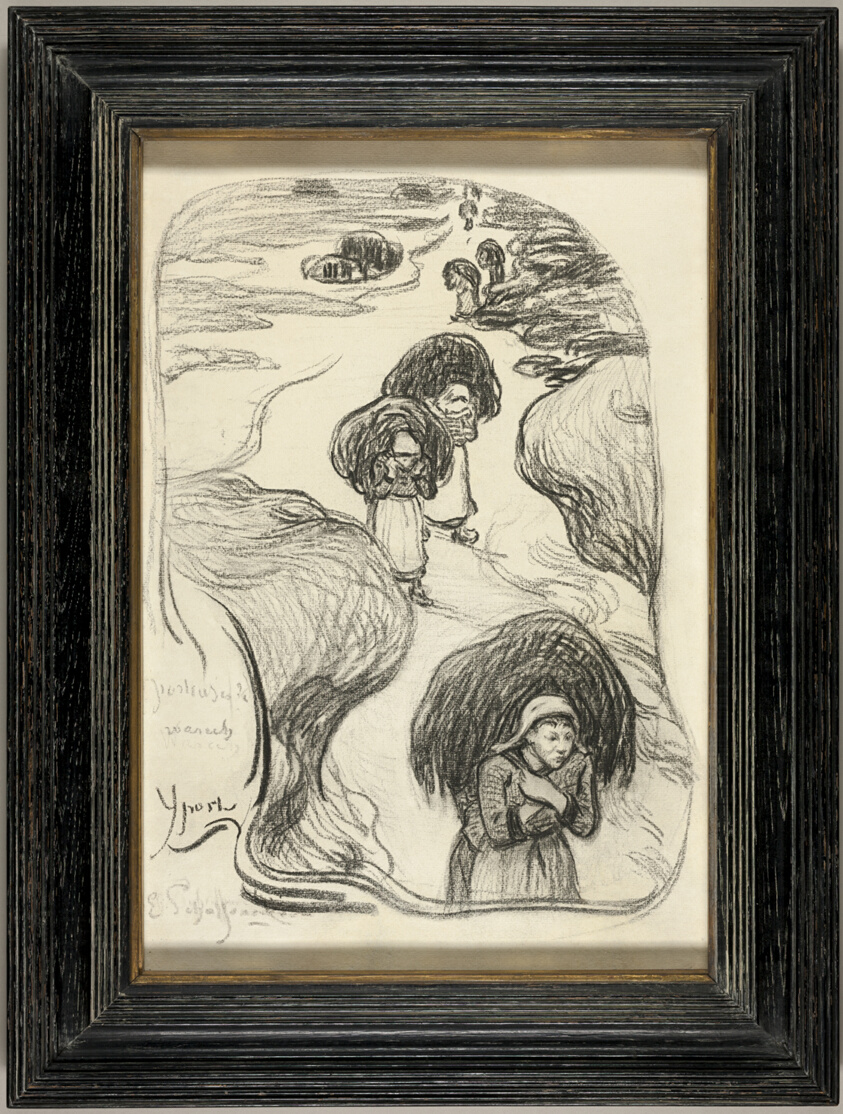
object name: Drawing and Watercolor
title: Seaweed Gatherers, Yport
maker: Émile Schuffenecker; French, 1851-1934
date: 1889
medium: Charcoal with touches of stumping on cream laid paper, laid down on ivory wove paper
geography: France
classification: charcoal; paper; prints and drawing